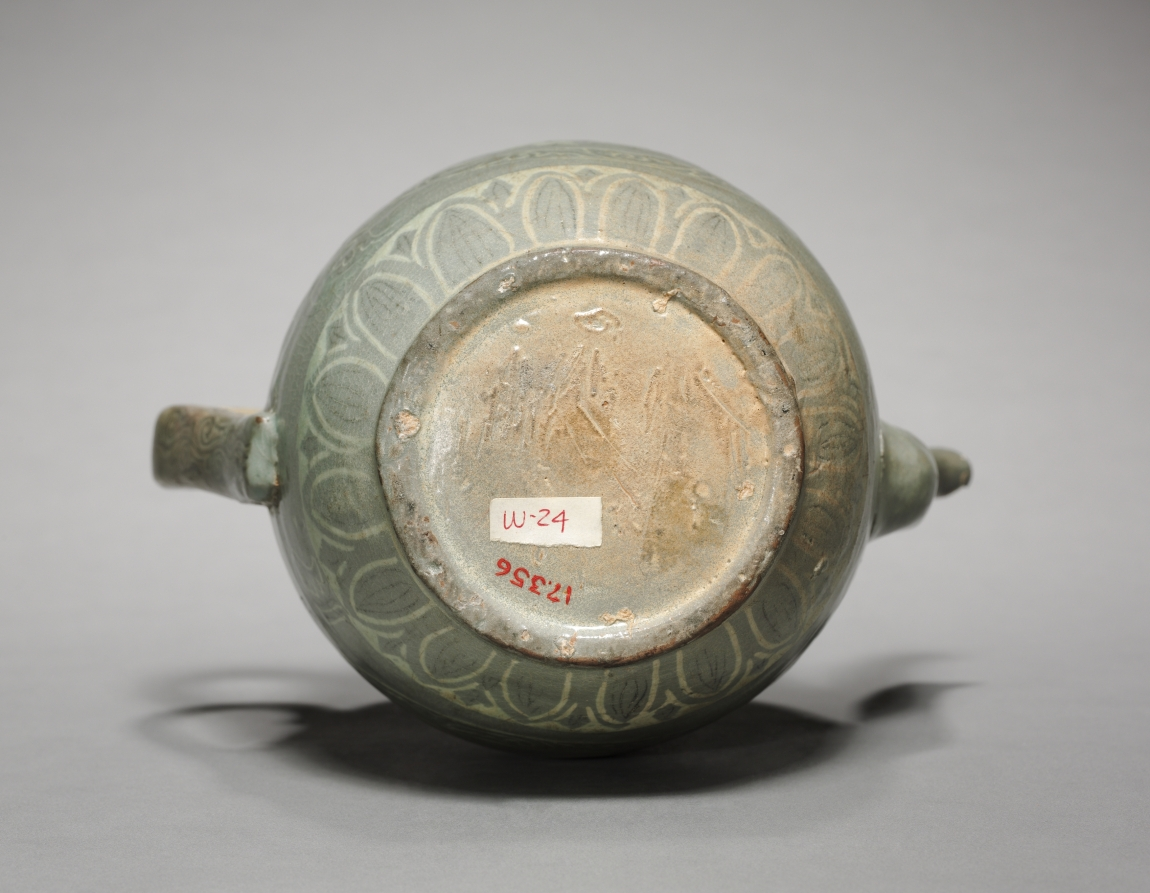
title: Pitcher with Inlaid Figure and Willow Design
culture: Korea, Goryeo dynasty (918–1392)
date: 1200s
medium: celadon ware with inlaid white and black slip decoration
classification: Ceramic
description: Representations of the elite’s elegant gatherings also appear on craft art designs, particularly depictions of the four accomplishments celebrated as cultivated pastimes by the scholar-literati elite—that is, playing stringed instruments and chess, and practicing calligraphy and painting. The image on this rare Korean inlaid celadon of two figures sitting together under a tree is comparable to renderings featuring the accomplishment motif of playing chess, or baduk in Korean.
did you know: As one of the oldest board games invented in China, this East Asian chess is still played in international competition venues.